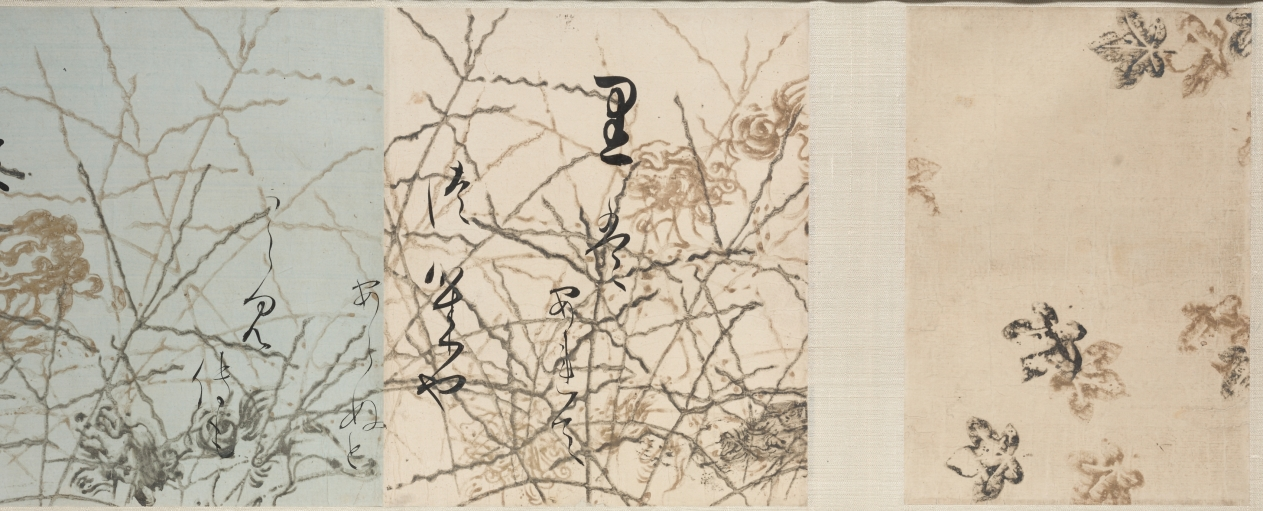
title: Selections from the New Collection of Japanese Poems from Ancient and Modern Times (Shinkokin wakashū) with Printed Designs of Chinese Lions and Crab Finger Grass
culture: Japan, Edo period (1615–1868)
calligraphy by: Hon'ami Kōetsu (Japanese, 1558–1637)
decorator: Tawaraya Sōtatsu (Japanese, c. 1570–c. 1640)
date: early 1600s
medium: handscroll; ink, gold, and silver on paper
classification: Calligraphy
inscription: Seal: 光悦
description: Hon’ami Kōetsu was a calligrapher and craftsman who frequently collaborated with the painter Tawaraya Sōtatsu, considered the first master of the Rinpa school. Kōetsu brushed seven poems from the autumn section of a poetry anthology onto dyed paper with motifs designed and printed in gold and silver by Sōtatsu.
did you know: Before becoming a master painter of screens, Tawaraya Sōtatsu painted fans.